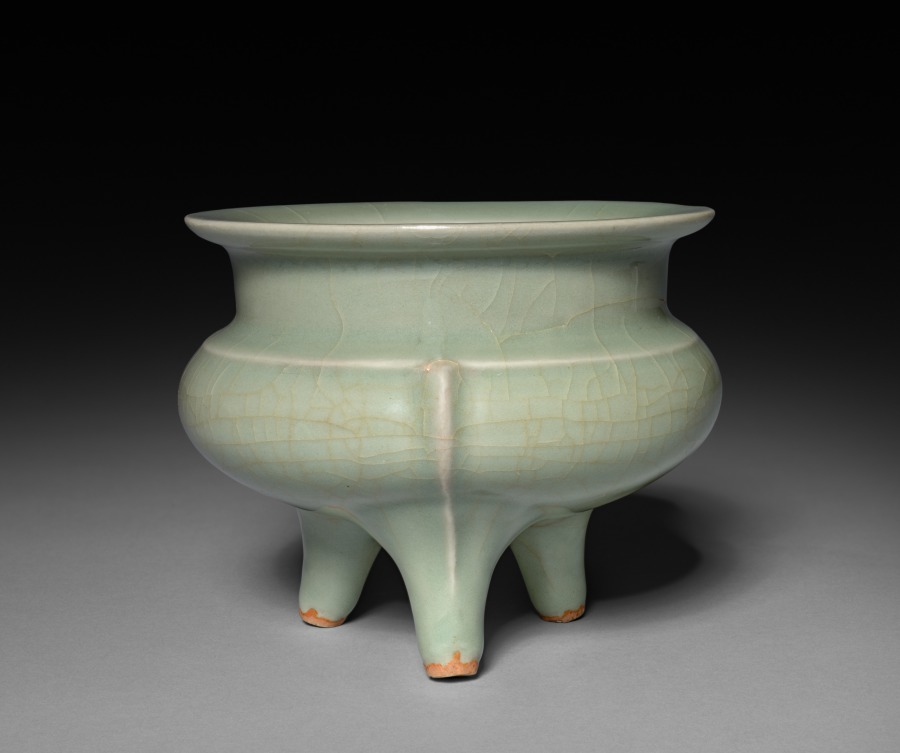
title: Incense Burner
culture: China, Southern Song dynasty (1127-1279)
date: 960–1279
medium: glazed porcelain, Longquan ware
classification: Ceramic